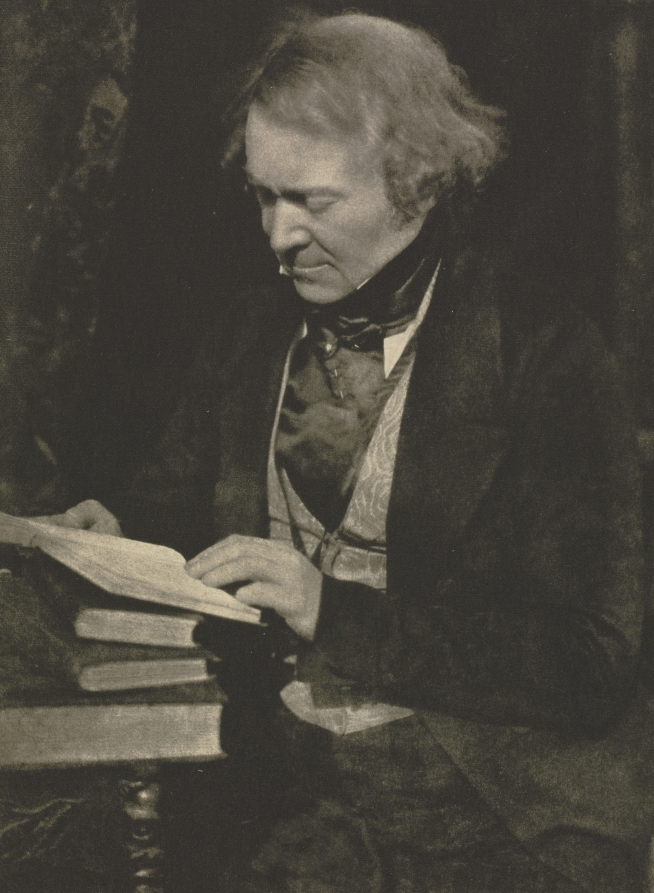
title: Camera Work: Mr. Rintoul, Editor "Spectator"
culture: England, 20th century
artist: David Octavius Hill (British, 1802–1870)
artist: and Robert Adamson (British, 1821–1848)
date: 1912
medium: photogravure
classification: Bound Volume